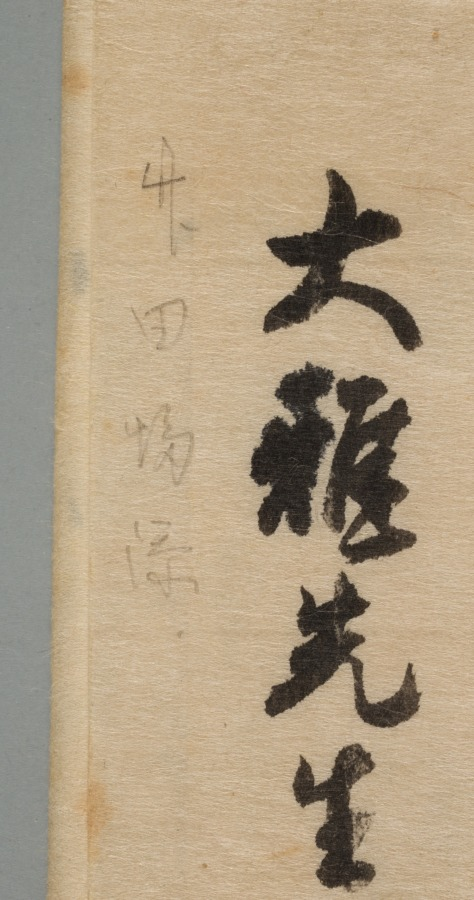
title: Mountain View and Blue Water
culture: Japan, Edo period (1615–1868)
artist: Tanomura Chikuden (Japanese, 1777–1835)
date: early 1800s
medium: hanging scroll; ink, color, and gold on paper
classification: Painting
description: Tanomura Chikuden was an eminent painter whose adopted son, Tanomura Chokunyū (1814–1907), was Seifū Yohei III’s painting teacher. This work was displayed at a gathering commemorating the 10th anniversary of Chokunyū’s death, something we know only because its custom-made box and archival documents have been carefully kept together. The box inscription also confirms that Chikuden was emulating the style of the Mi family of painters, active during China’s Southern Song dynasty (1127–1279). The painting’s Chinese-style silk wrapper is inscribed and sealed on its interior by members of Chokunyū’s community.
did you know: The mountain shapes are built up with multiple small wet strokes.